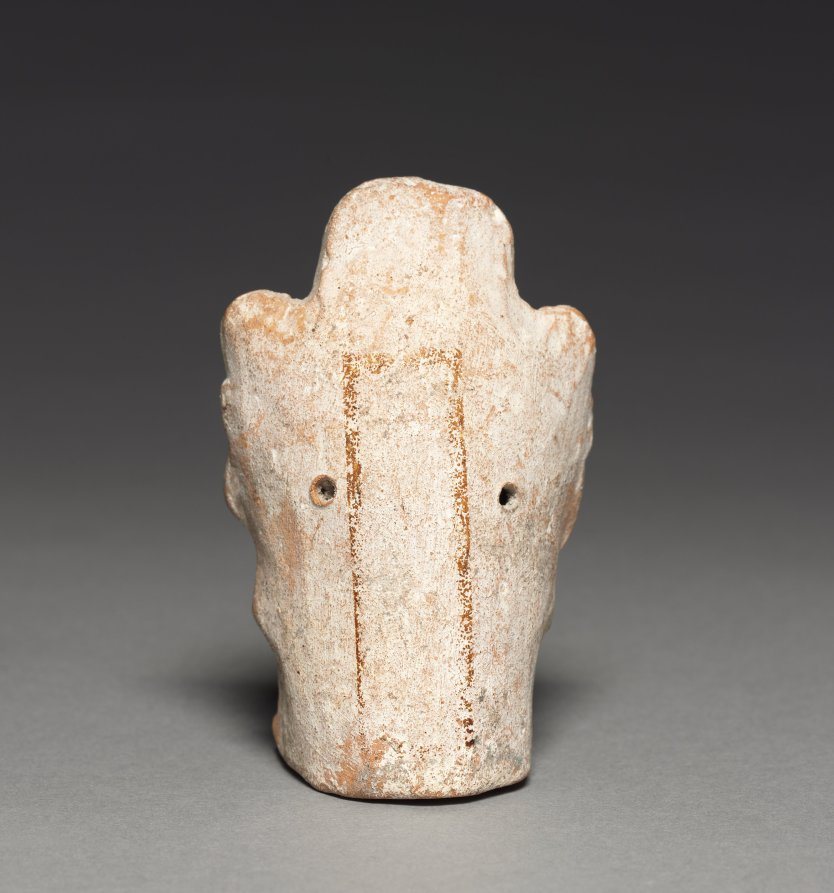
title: Female Figurine Rattle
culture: Mexico, Campeche, Jaina Island, Maya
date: 600–900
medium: Ceramic, pigment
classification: Sculpture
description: This hollow, mold-made figurine contains pellets that transform it into a rattle used as a musical instrument, perhaps during household rituals.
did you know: This hollow, mold-made figurine contains pellets that transform it into a rattle.